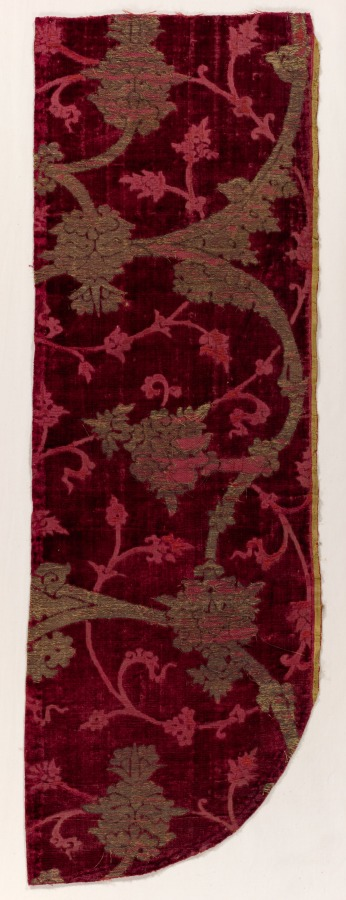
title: Velvet Fragment (of a Chasuble ?)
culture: Italy, 15th century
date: 1400s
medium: velvet (cut, voided, and brocaded): silk and gold thread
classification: Velvet